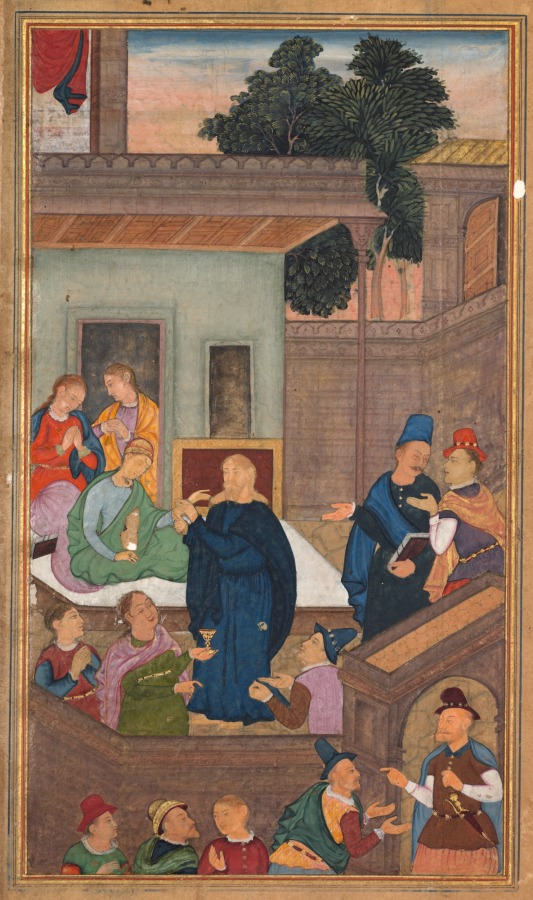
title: Jesus Raises Jairus’s Daughter from the Dead (folio 82 verso), from a Mirror of Holiness (Mir’at al-quds) of Father Jerome Xavier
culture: Mughal India, Allahabad, made for Prince Salim (1569–1627)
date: 1602–4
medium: Gum tempera, ink, color, and gold on paper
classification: Manuscript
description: Jesus gestures toward the 12-year-old girl he has awakened from the dead, in a lesser-known miracle included in Father Jerome’s text. The elder of a synagogue, the girl’s father, named Jairus, had shown great faith in Jesus and had begged him to help his daughter; Jairus may be the figure dressed as a Jesuit in a dark cloak and tall matching cap behind Jesus. Jesus admonished the crowd to tell no one about the miracle, but people turn and gesture to one another, unable to keep from spreading the news.